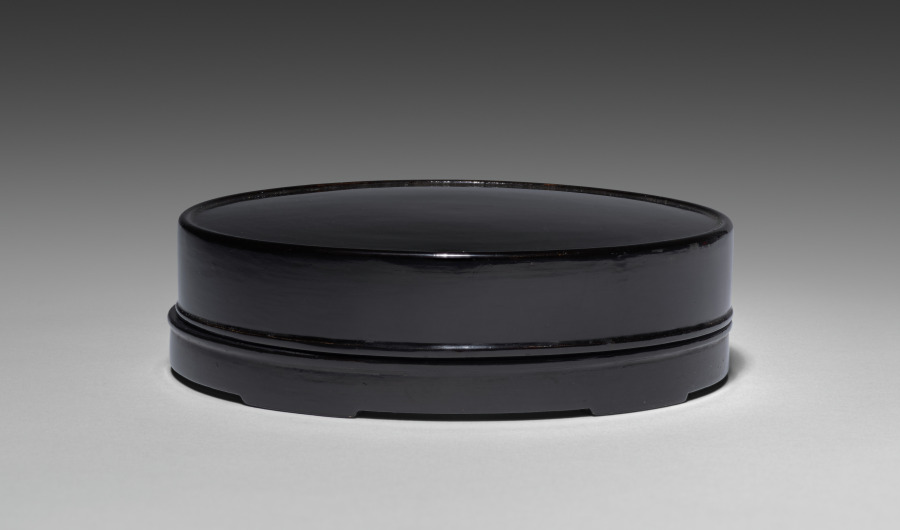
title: Inkstone in the Shape of a Roof Tile with Seal Script Characters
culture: China, Qing dynasty (1644–1911)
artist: Workshop of Jian Guzhai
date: 1700s–1800s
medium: She stone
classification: Stone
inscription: 七葉永祥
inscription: 「鑑古齋仿製」 「穎川春暉館文寶」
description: This inkstone is particularly noteworthy for its inscriptions in two styles. The base shows four characters in seal script (zhuanshu) expressing auspicious, or favorable wishes, while the characters on the side in standard script (kaishu) record the name of the workshop and that of the collector’s studio. Inkstones were used to grind solid ink cakes with the addition of water to produce liquid ink for brush painting and calligraphy.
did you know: The four large seal script characters on the base of this inkstone, 七葉永祥, may be read as "eternal good fortune for seven generations."